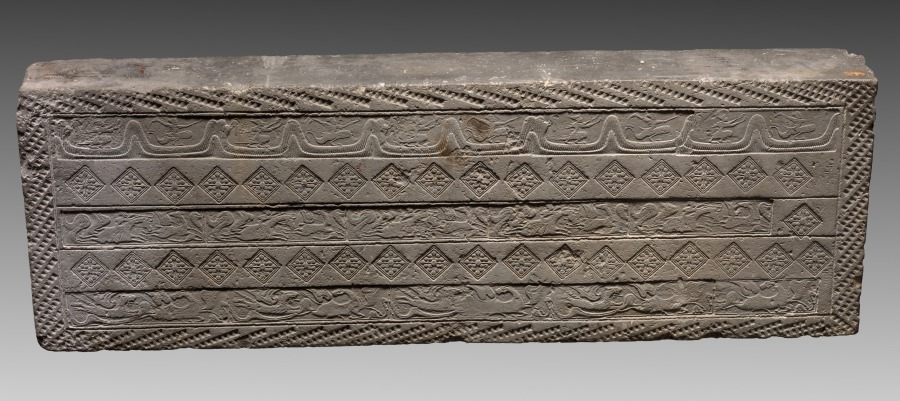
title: Tomb Tile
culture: China, Han dynasty (202 BCE–220 CE)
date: 206 BCE–220 CE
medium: earthenware with stamped decoration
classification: Ceramic